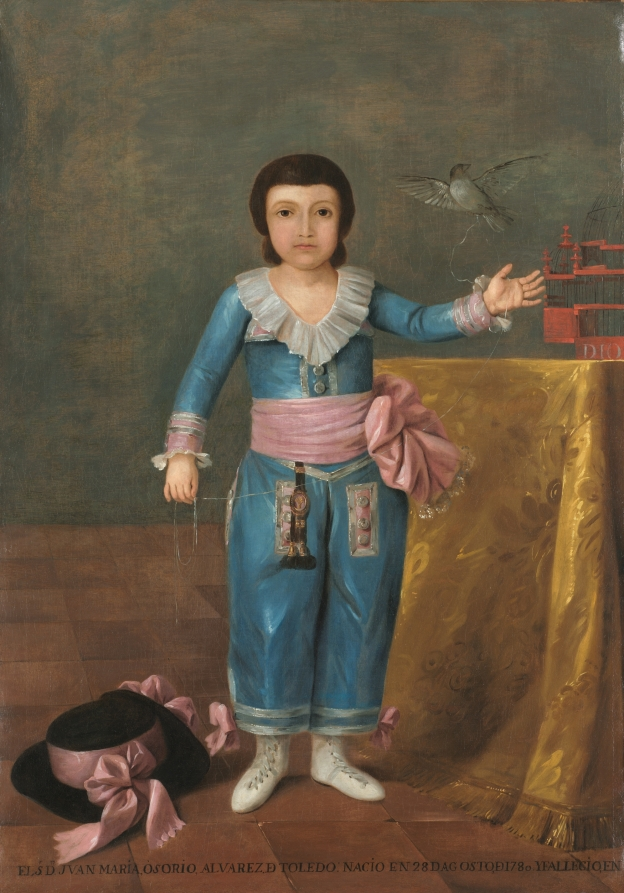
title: Portrait of Juan Maria Osorio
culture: Spain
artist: Agustín Esteve y Marques (Spanish, 1753–c. 1820)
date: c. 1786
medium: oil on canvas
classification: Painting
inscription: Inscribed at bottom: "EL Sr. Dn. JUAN MARIA, OSORIO, ALVAREZ. D TOLEDO; NACIO EN 28 DAGOSTO, D 1780 Y FALLECIO, EN."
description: Esteve y Marques enjoyed a successful early career as a court painter and society portraitist, working as an assistant to the Spanish painter Francisco de Goya before becoming court painter to King Charles IV. The young subject of this portrait is Juan Maria Osorio, one of three sons of Don Vicente Osorio Moscoso Fernandez de Cordoba, the 13th count of Altamira, who also commissioned multiple family portraits from Goya. Esteve and Goya often shared aristocratic patrons, and there are also portraits of the count and his wife attributed to Esteve. The portrait of Juan Maria is somewhat static in execution, the subject lacking vigor and psychological intensity in Esteve's depiction. Yet some of the stiffness of the Cleveland portrait may be due to the fact that this work was probably a posthumous portrait of Juan Maria, who died in 1785 at the age of five.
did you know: The boy holds a string attached to a linnet, a type of finch popular as a pet.